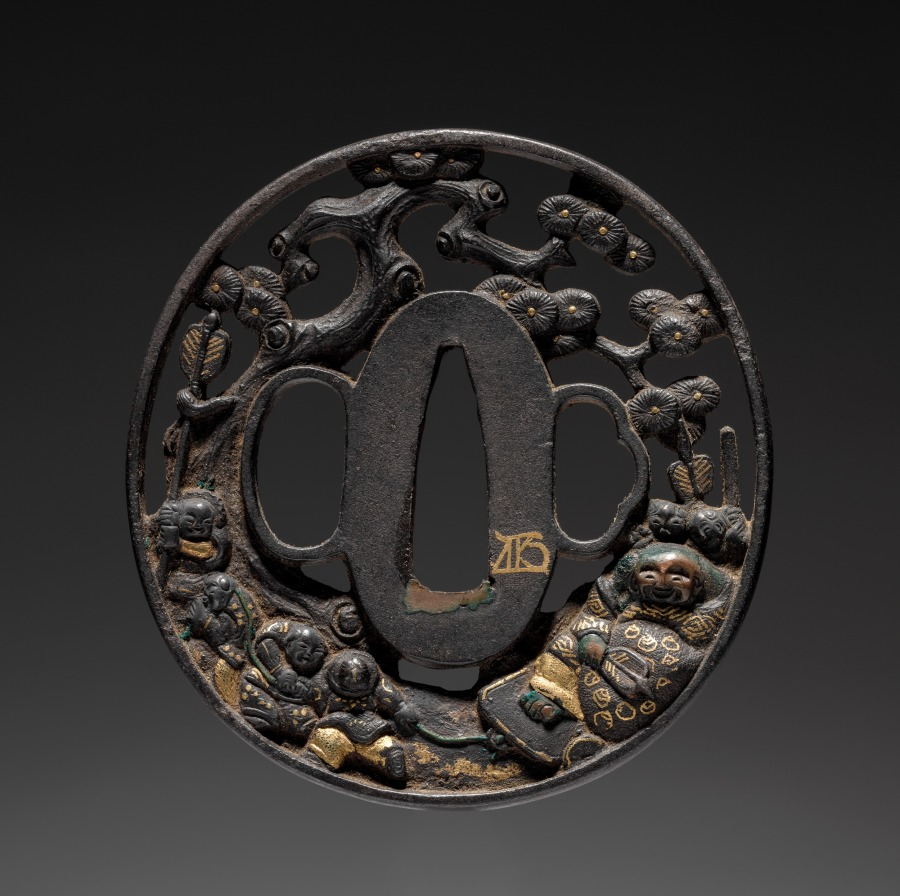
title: Sword Guard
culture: Japan, Edo period (1615–1868)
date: late 1700s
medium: iron with gold and copper inlay (Tetsugendo type)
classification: Arms and Armor